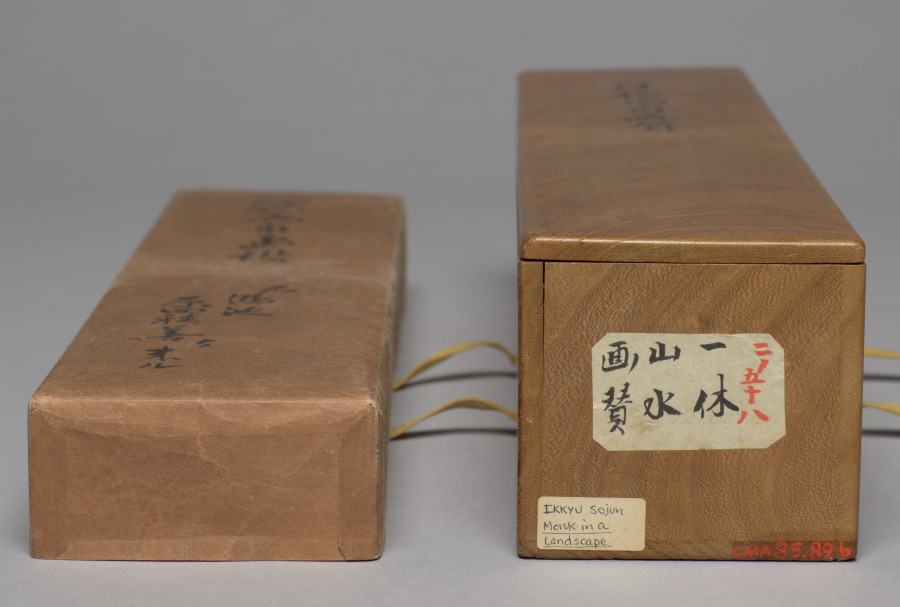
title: Listening to the Wind in the Pines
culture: Japan, Muromachi period (1392–1573)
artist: Ikkyū Sōjun (Japanese, 1394–1481)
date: 1400s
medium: hanging scroll; ink on paper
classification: Painting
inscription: 山居僧聴松風/何須臨済徳山禅一箇住山/三十年公案工夫了畢後/長松風静罷参眠 (transcribed by Trevor Menders with Zheng Xiaoying 2017, revised by Osvaldo Mercuri 2021)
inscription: 紫野龍寶門客东海純一休老和尚畫と詩一筆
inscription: 落款 一休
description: A monk sits in contemplation below an overhang covered with pine. The poem, titled "Monk in the Mountains Listening to the Wind in the Pines," refers to two Chinese Chan (Zen) Buddhist monks active in the ninth century. It may be translated as follows: Why must the Zen of Rinzai (Linji Yixuan) and Tokusan (Deshan Xuanjian) reside in a single temple for thirty years? Once he's solved his kōan, (the monk) ends his practice and falls asleep in the quietness of the wind among the tall pines. (translated by Osvaldo Mercuri) According to an inscription following the poem, both painting and verse were done by an eminent Japanese Buddhist monk known for revitalizing the Kyoto temple Daitokuji.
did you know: The word mountain, appearing in the title to the poem on this painting, can also refer to a temple.